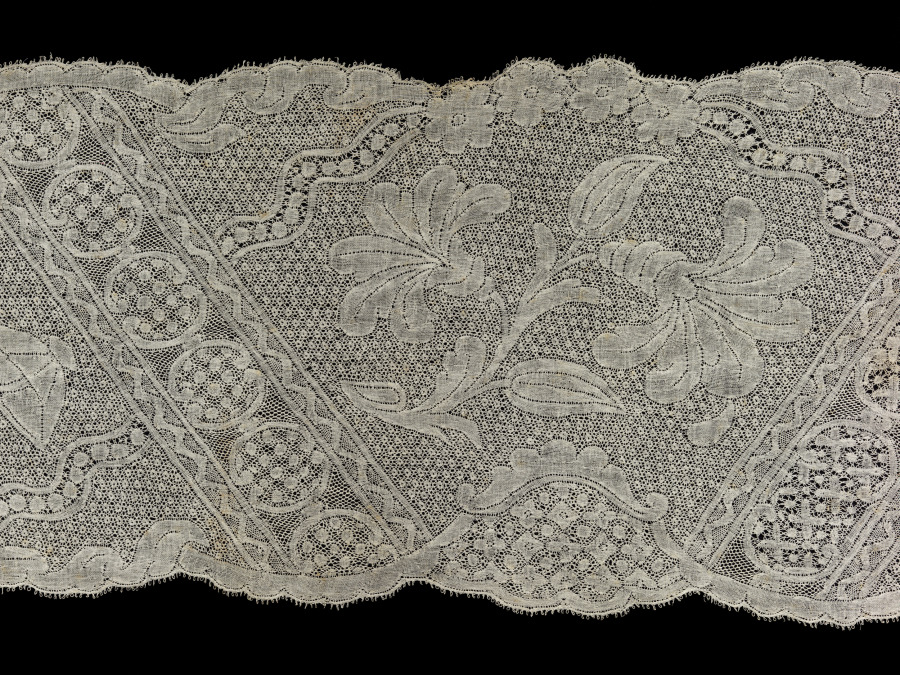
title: Half of a Lace Lappet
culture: Belgium, Binche(?)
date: 1730s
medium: Linen: bobbin lace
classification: Lace